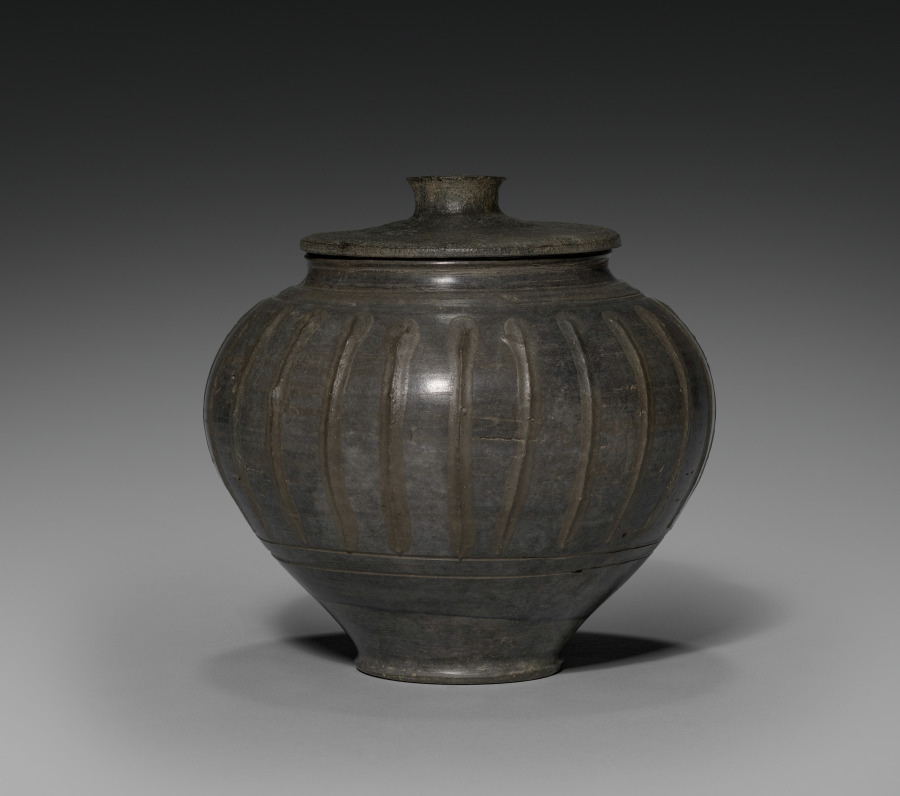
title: Pot with Cover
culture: Rhenish (Cologne), Gallo-Roman, 2nd century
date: 100–200 CE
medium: tan ware with gray and some brown burnished slip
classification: Ceramic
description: This elegant pot with its matching lid was made using a potter’s wheel, evident from the subtle horizontal rings that are visible across the belly of the vessel. The vertical ribs were added after the pot was removed from the wheel, using a thick clay paste. The vessel’s lid suggests that it was used for storage.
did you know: The shiny surface of this pot was made using a technique called burnishing, performed by polishing a surface with a hard, smooth object.